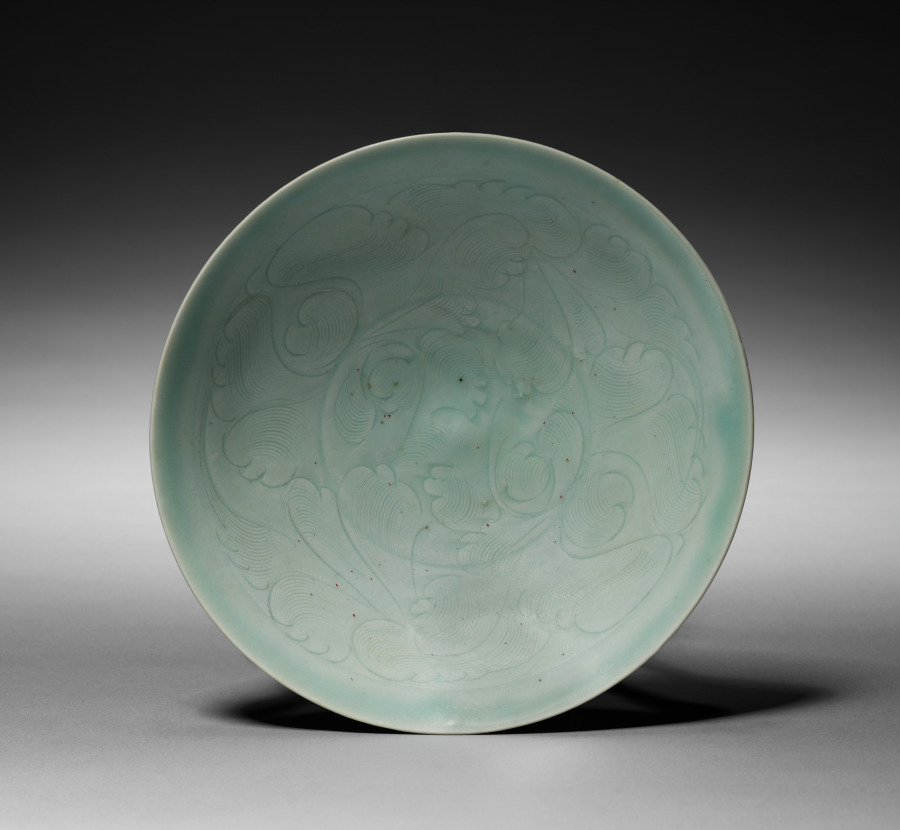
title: Dish with Carved Floral Design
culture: South China, Southern Song dynasty (1127–1279)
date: 1100s–1200s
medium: Porcelain with pale bluish-white (qingbai) glaze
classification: Ceramic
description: This shallow and wide bowl and the conical one (CMA 2020.182) are both hand-incised with decoration suggesting waves, clouds, or floral sprays. All of these motifs had auspicious meaning: waves and clouds bring rain that fertilizes the fields, and flowers and plants were often associated with the beauty of human virtues. The carved and combed designs were swiftly cut with a wooden tool into the unfired leather-hard body before glazing. Once the glaze was applied, it pooled in the incised areas rendering the design more visible.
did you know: Never intended for imperial use, qingbai ware was among the first mass-produced porcelain types and became a popular export.